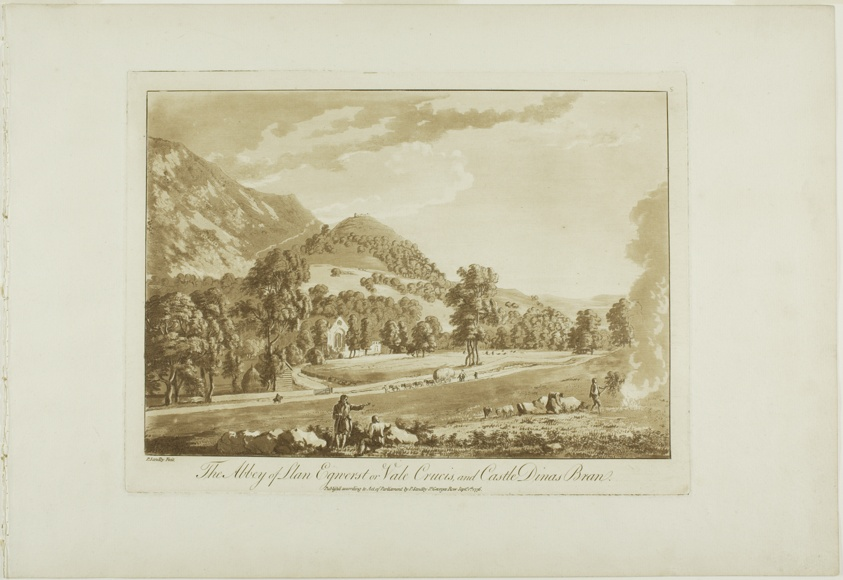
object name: Print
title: The Abbey of Llan Egnerst or Vale Crucis, and Castle Dinas Bran, plate five from Twelve Views in North Wales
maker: Paul Sandby (English, 1731-1809)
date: 1776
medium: Aquatint with etching on ivory laid paper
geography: England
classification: etching; print; prints and drawing